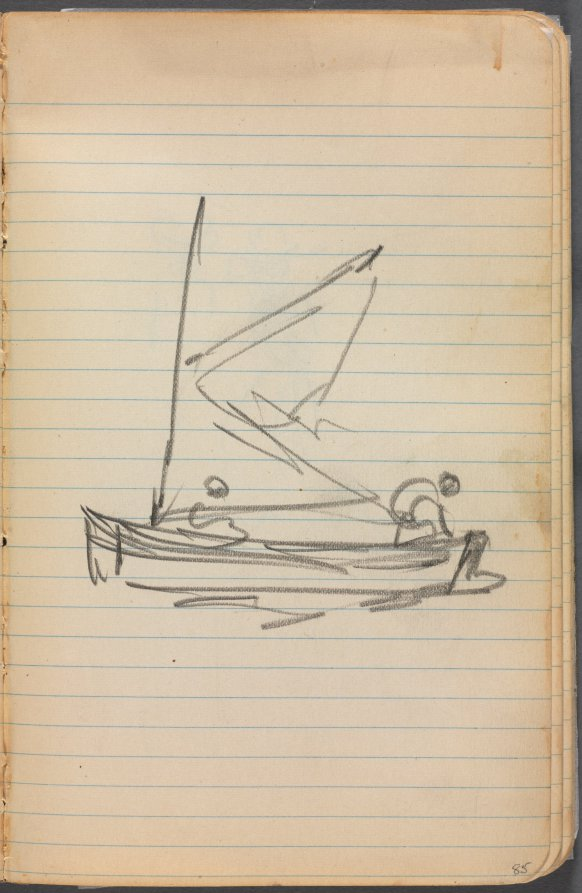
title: Sketchbook, page 085: Sailboat with Two Figures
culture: America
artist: Maurice Prendergast (American, born Newfoundland [now Canada], 1858–1924)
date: 1905–10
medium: graphite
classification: Bound Volume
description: This sketchbook contains 69 pages of drawings, a diary largely devoted to the state of the artist's health, and a three-page discourse on the nature of genius and ideas.